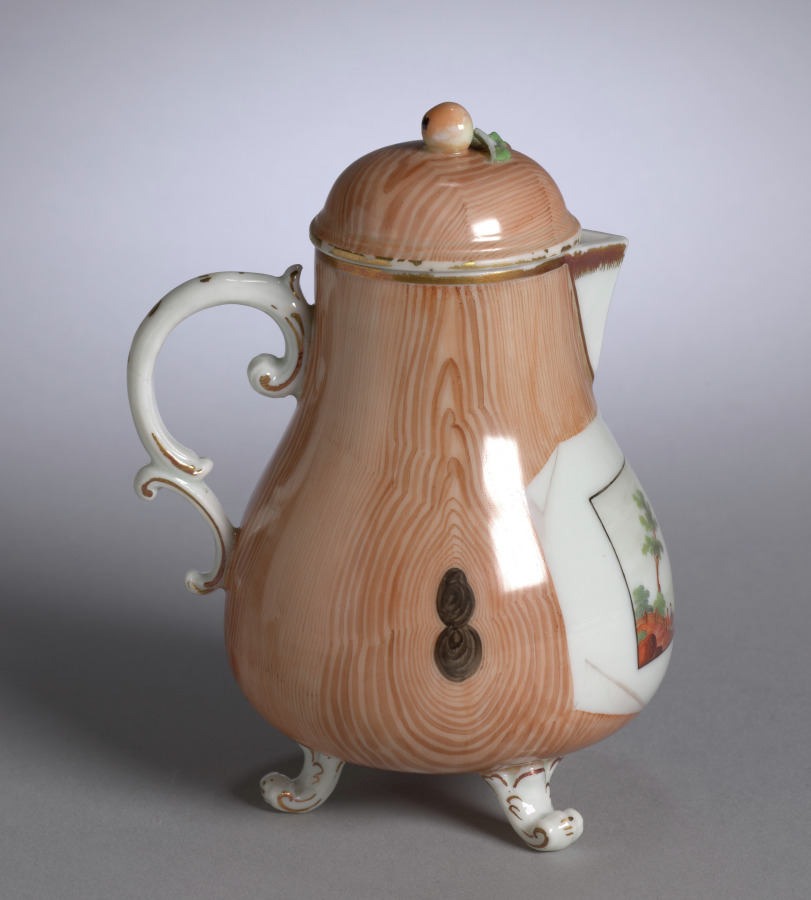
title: Covered Cream Jug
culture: France, 18th century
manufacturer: Niderviller Factory (French)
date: c. 1775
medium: hard-paste porcelain with enamel and gilt decoration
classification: Ceramic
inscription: inscribed at lower right corner of trompe l'oeil print: Niderviller.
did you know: Cream jugs with lids or covers usually held warm cream for coffee or tea.